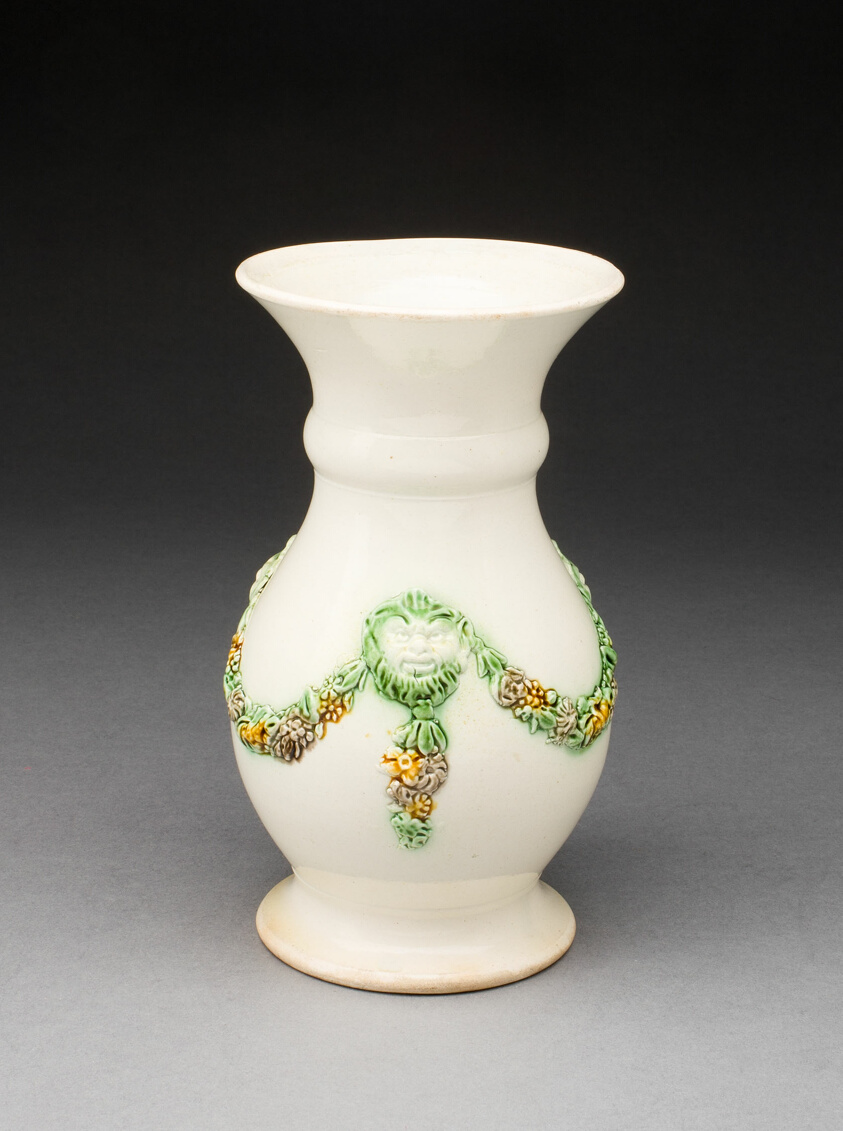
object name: Ceramics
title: Vase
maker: England, Staffordshire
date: c. 1750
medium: Lead-glazed earthenware (creamware)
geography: Staffordshire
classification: vase; vessel; creamware; european decorative arts; ceramics; earthenware; lead-glazed earthenware